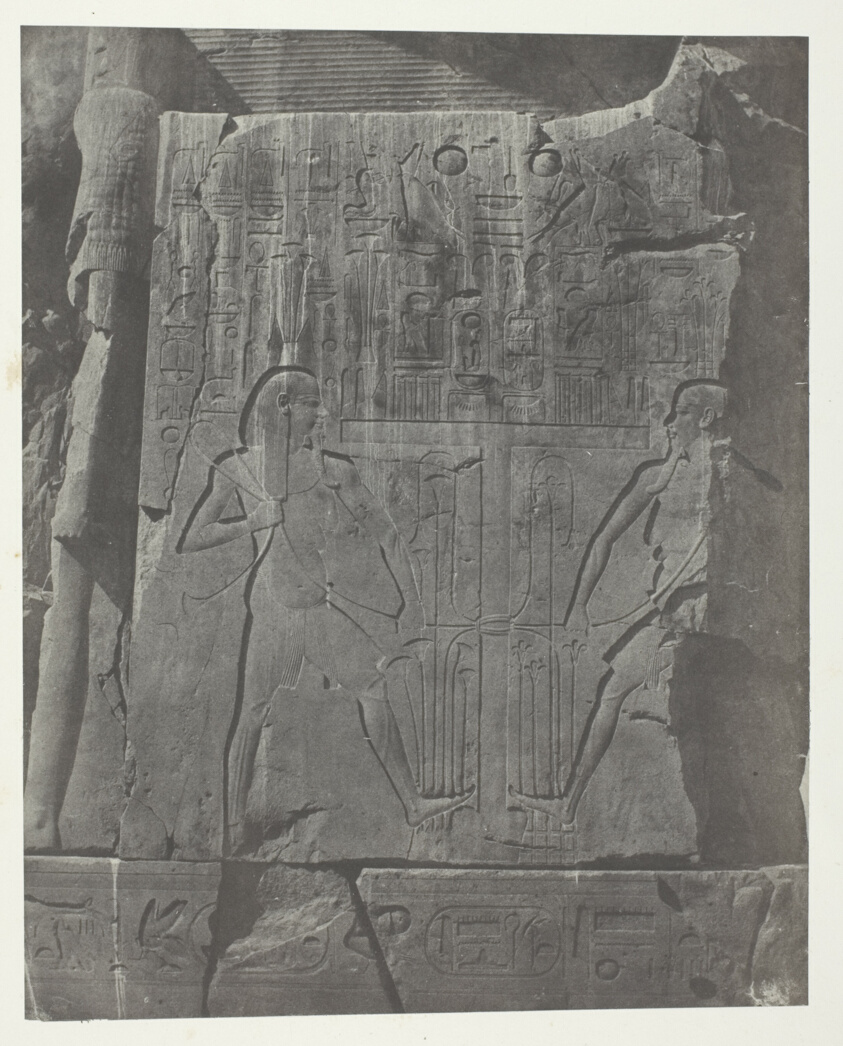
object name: Photograph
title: Gournah, Sculptures du Trône des Colosses; Thèbes, plate 57 from the album "Egypte, Nubie, Palestine et Syrie" (1852)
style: 19th century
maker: Maxime Du Camp (French, 1822–1894)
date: 1849/51, printed 1852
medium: Salted paper print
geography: France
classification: salted paper print; photographic process; photography; photograph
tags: Collected by Hugh Edwards, Egypte, Nubie, Palestine et Syrie